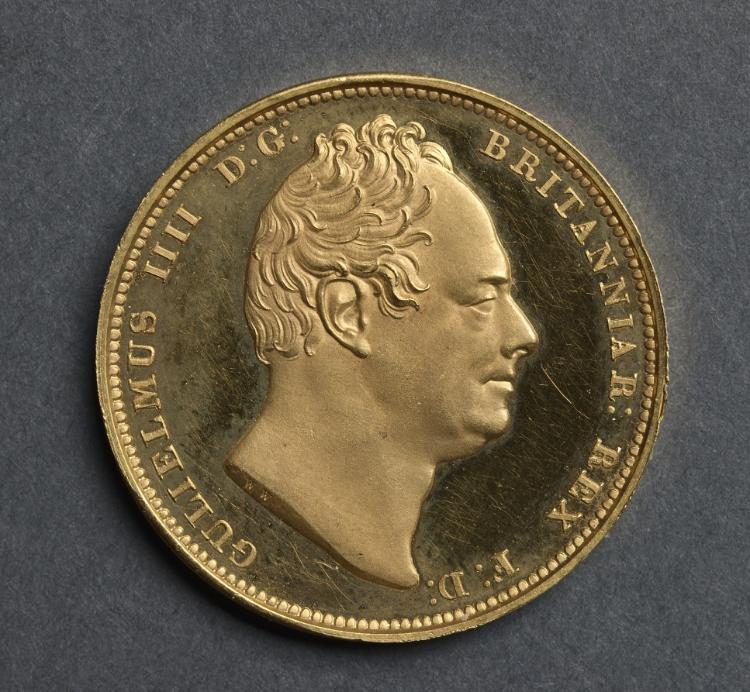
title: Two Pound Piece: William IV (obverse)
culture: England, William IV, 1830-1837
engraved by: Jean Baptiste Merlen (French, 1769–1850)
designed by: William Wyon (British, 1795–1851)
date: 1831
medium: gold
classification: Coins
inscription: BRITANNIAR: REX F: D: GULIELMUS IIII D: G: